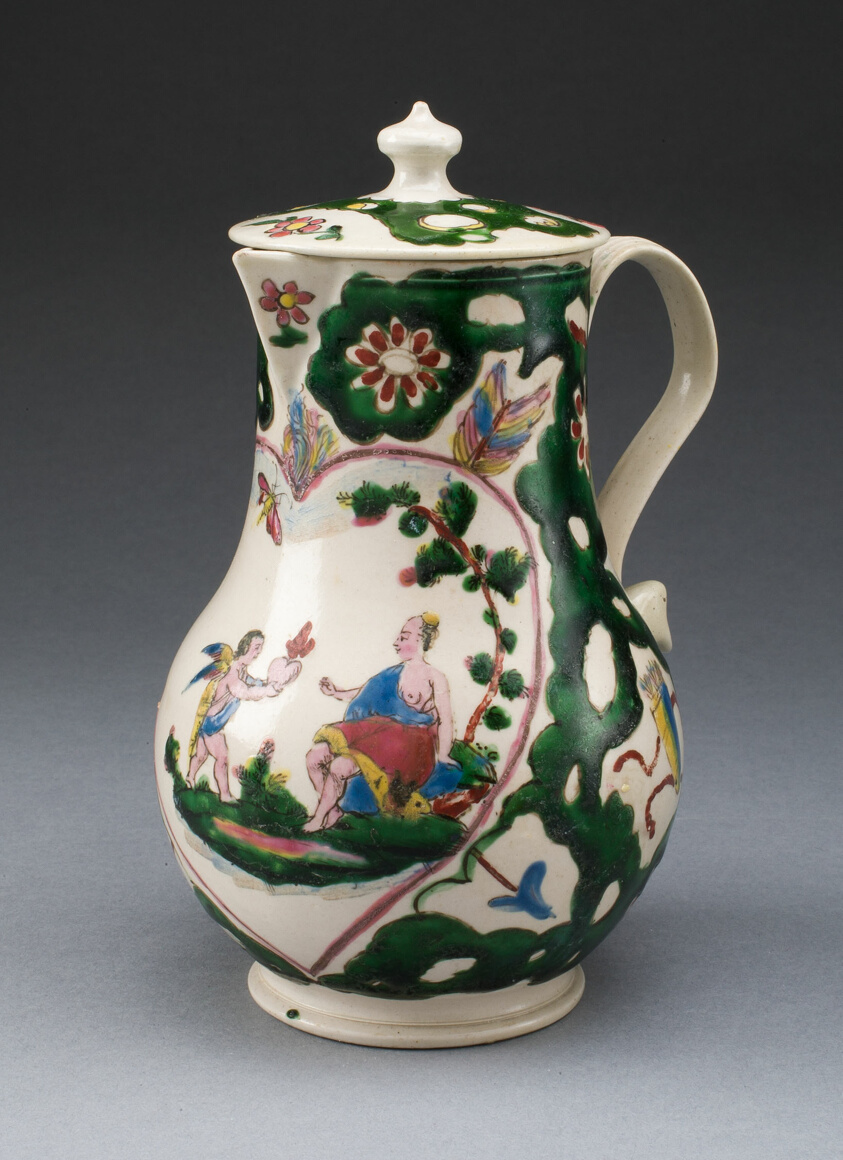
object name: Ceramics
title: Jug with Cover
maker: Staffordshire, England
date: c. 1760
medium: Salt-glazed stoneware, polychrome enamels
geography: Staffordshire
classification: salt-glazed stoneware; european decorative arts; ceramics; stoneware